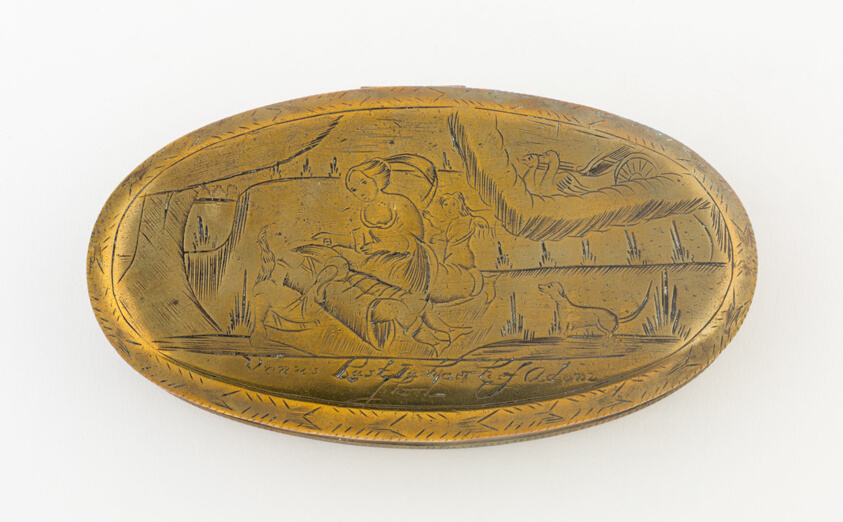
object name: Metalwork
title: Tobacco Box with Scene of Venus and Adonis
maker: England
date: early 18th century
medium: Brass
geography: England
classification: container for personal use; box; european decorative arts; metalwork; decorative object/ornament